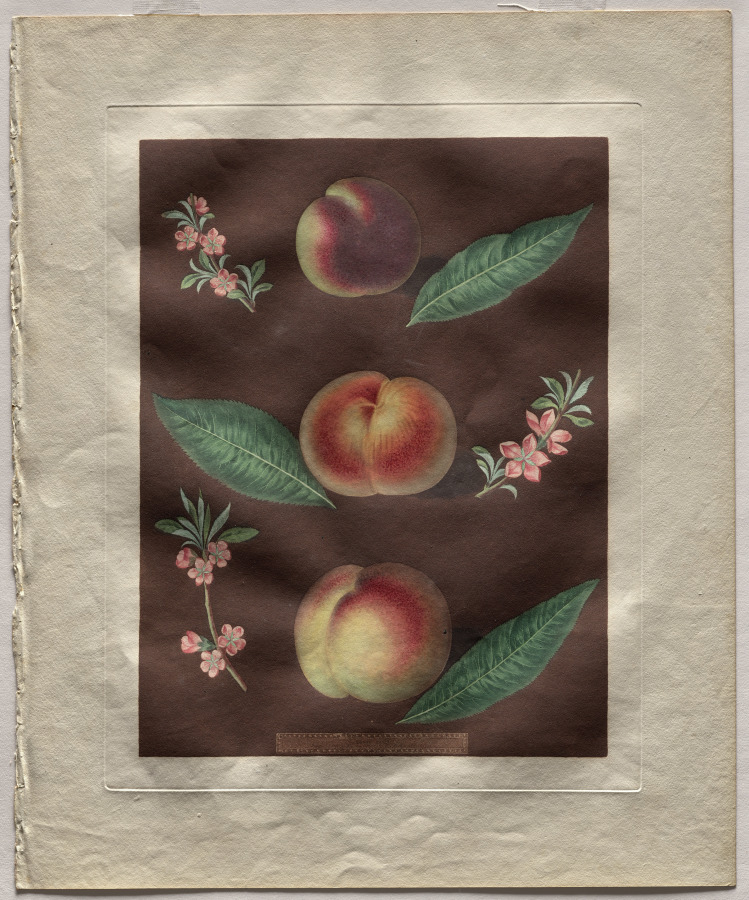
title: Pomona Britannica: No. 33 - Peaches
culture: England, 19th century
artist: George Brookshaw (British, 1751–1823)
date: 1805, published 1812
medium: aquatint and stipple engraving printed in color and hand colored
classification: Print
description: This color aquatint etching is one plate from George Brookshaw’s 1812 illustrated volume Pomona Britannica. Named after the Roman goddess of fruit trees, gardens, and orchards, Brookshaw intended the volume to be the English “country gentleman’s” guide to the science of classifying and identifying fruits (pomology). Many of Brookshaw’s models came from the Royal Gardens at Hampton Court and Kensington Gardens. Each print featured one fruit, often life-size, including detailed depictions of its flower and leaves. Printed in color with hand-painted highlights, this and other illustrated botanicals formed an essential part of the cultured English library in the early 19th century.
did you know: Peaches were not introduced to England until the 17th century, apparently from its North American colonies.